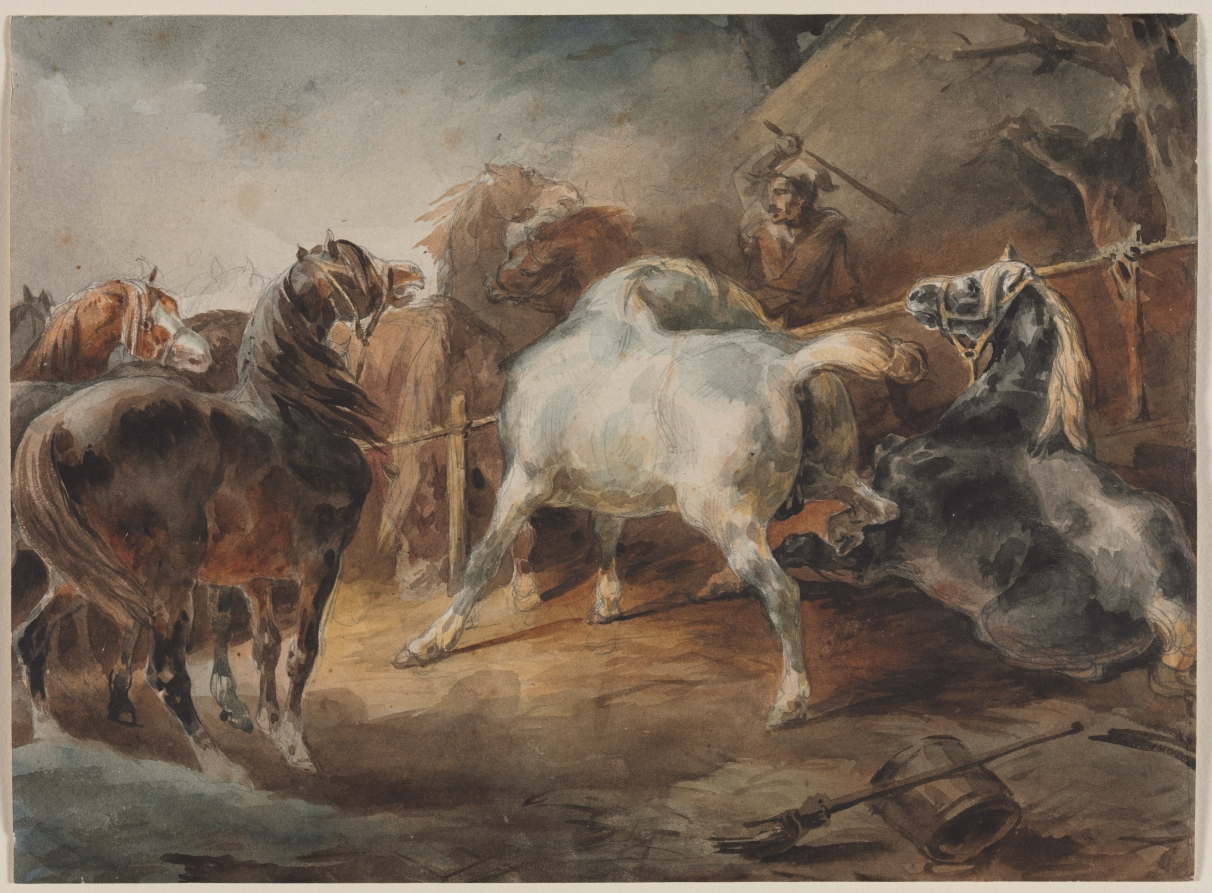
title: Fighting Horses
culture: France, 19th century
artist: Théodore Géricault (French, 1791–1824)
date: c. 1820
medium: watercolor over graphite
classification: Drawing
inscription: on old label (now removed), in brown ink: This drawing by Géricault was / the property of The Marquis of / Hertford & left to Sir Richard / Wallace, who in time bequethed / it to Sir John Murray Scott / Bart: / Purchased by Leggatt Bros at / the sale of Sir John Murray / Scott's Drawings etc, at 5 / Connaught Place Marble Arch. / Feb: 9th 1914.; on old label (now removed): across top, in graphite: 41 [circled] Dr. Bellingham Smith; down center, in brown ink: J. L. A. T. Géricault / Horses Fighting / Colles Marquess of Hertford / Sir Richard Wallace and / Sir John Murray Scott / Exhib. Burlington Fine Arts Club / 1922 . No 52. / Pictures drawings & Sculptures of French School / of the last 100 years.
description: Théodore Géricault turned away from traditional subjects such as mythology and the Bible in favor of modernity, emotion, and drama. He was fascinated by the power and physical beauty of horses and depicted them often. Géricault himself was an avid rider and his paintings and drawings on this theme are characterized by vigor and movement. In this watercolor, he focused on a conflict, in which a groom struggles to separate a pair of fighting horses—a scene that appeared only a few times throughout his many interpretations of similar subjects. A sketchbook, now in the collection of the Art Institute of Chicago, shows that the artist carefully studied the animals, including the kicking white stallion at center, in graphite before beginning this finished work.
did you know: Théodore Géricault began this work with sketches from life, which became a graphite underdrawing beneath the watercolors.